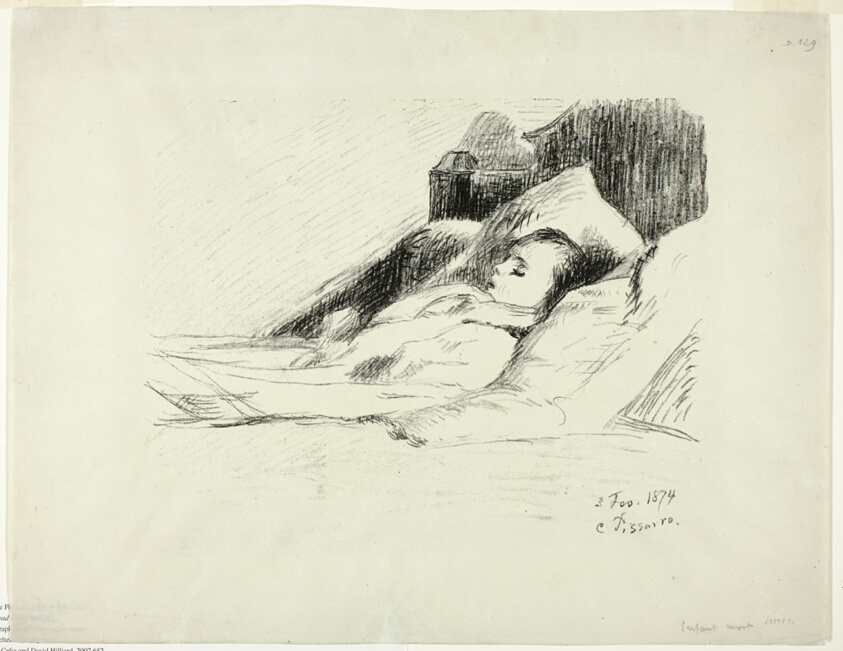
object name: Print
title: Dead Child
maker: Camille Pissarro (French, 1830-1903)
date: 1874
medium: Lithograph in black on grayish-ivory wove China paper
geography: France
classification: lithograph; print; prints and drawing